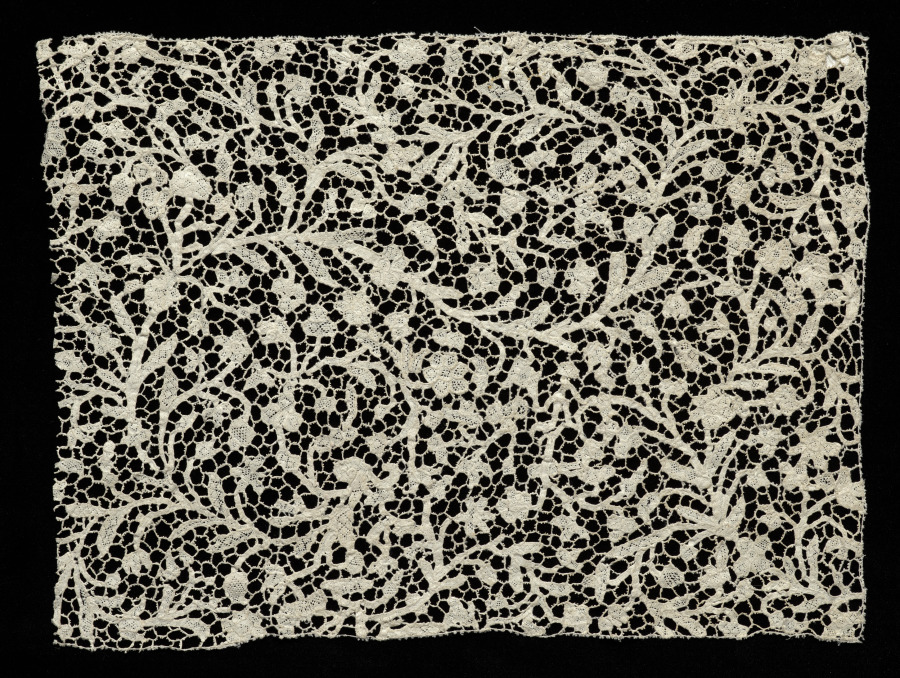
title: Fragment of Lace Edging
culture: Italy, Venice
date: 1600s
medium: Linen: needle lace (Venetian flat point)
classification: Lace